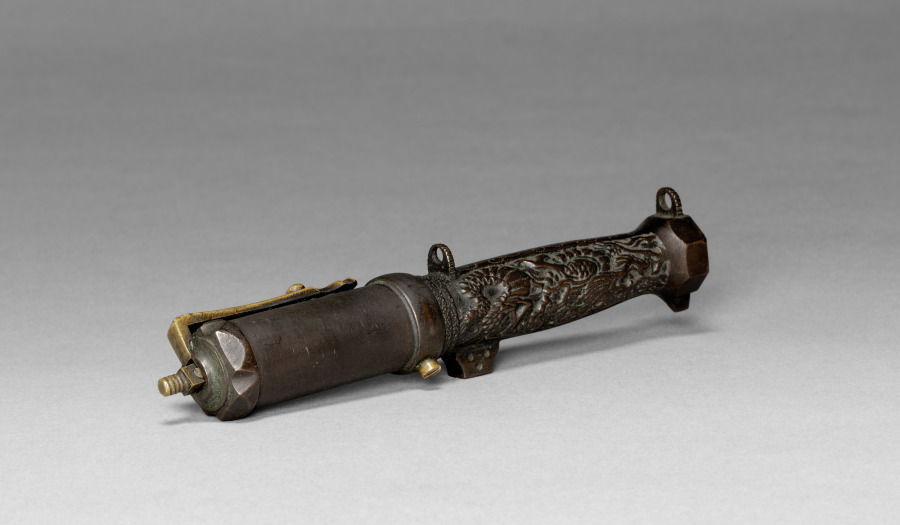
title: Hand Cannon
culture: Japan, Edo period (1615–1868)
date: 1615–1868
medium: bronze and brass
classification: Arms and Armor